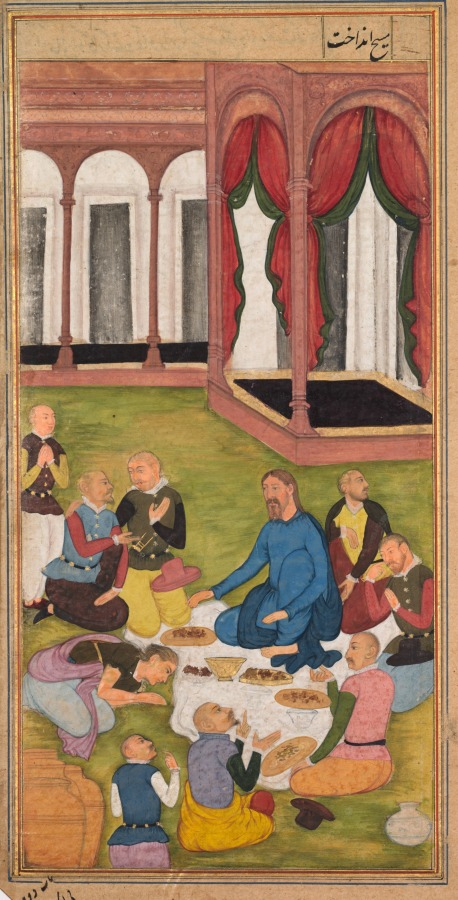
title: Mary Magdalene Presents Ointment to Jesus (folio 102 verso), from a Mirror of Holiness (Mir’at al-quds) of Father Jerome Xavier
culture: Mughal India, Allahabad, made for Prince Salim (1569–1627)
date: 1602–04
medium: Gum tempera, ink, color, and gold on paper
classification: Manuscript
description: While Jesus dined in the house of a Pharisee he was approached by Mary Magdalene, who threw herself to the ground and wept on Jesus’s feet with her tears. She then dried them with her hair and bathed them with expensive ointment. Her veil falls around her shoulders to reveal her hair’s disarray. Only Jesus appears to be calm as he extends his arms in a pacifying gesture; the other men point at their mouths and at each other, astonished at the dramatic behavior of this woman known to have been a prostitute. The plain black carpets and thin application of paint in some areas indicate that this painting was not finished.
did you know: Proportions of the portico and pavilion reveal some grasp of Renaissance ideals.